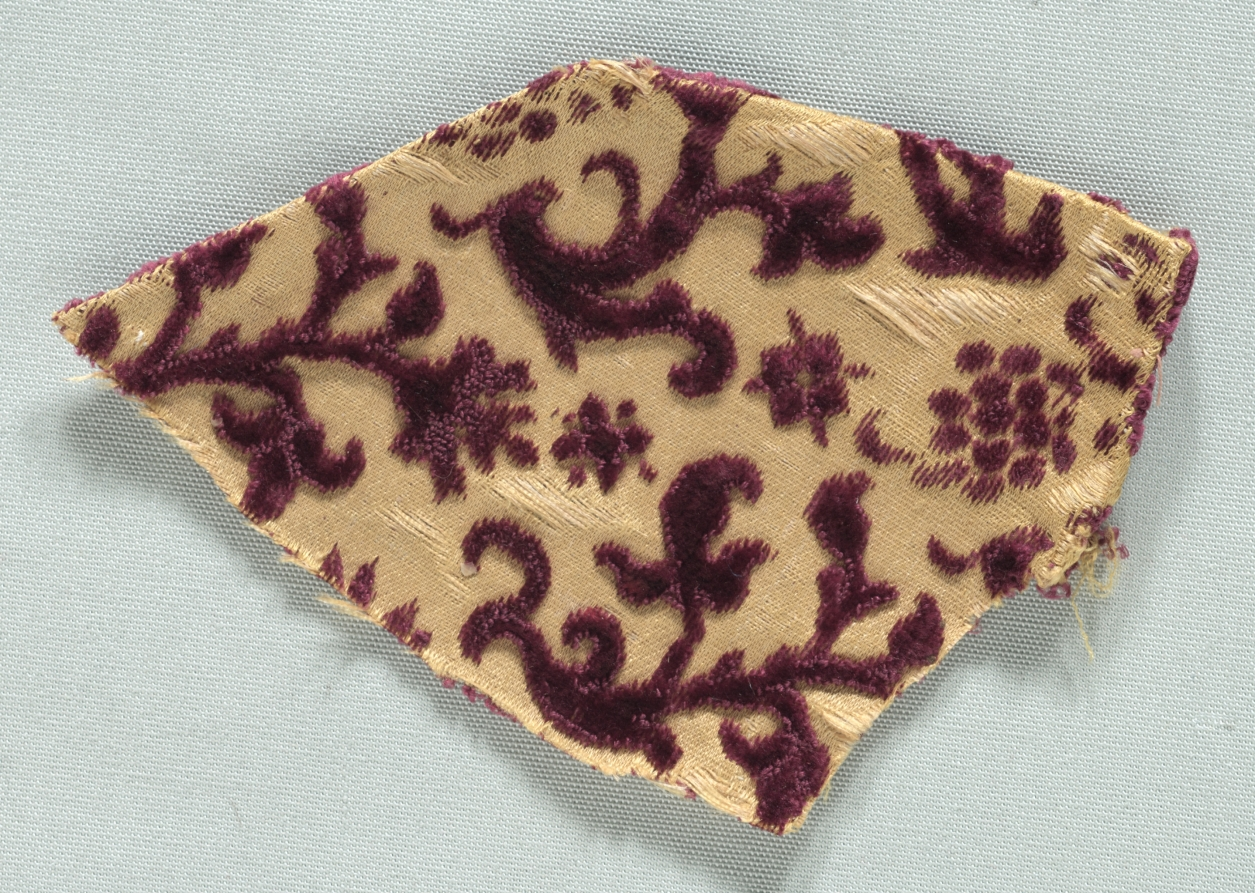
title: Velvet Fragment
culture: Italy, early 17th century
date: early 1600s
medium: velvet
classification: Velvet